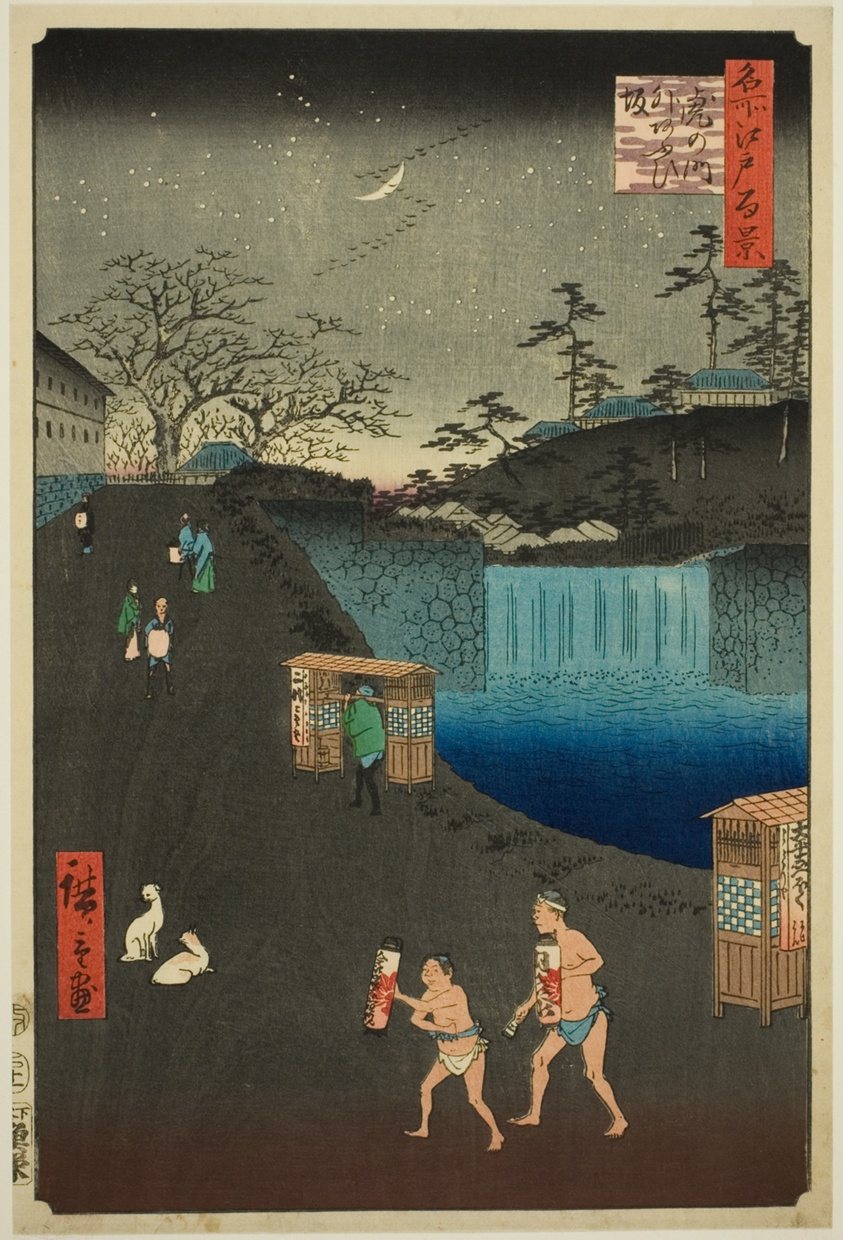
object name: Print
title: Aoi Slope, Outside Tora Gate (Toranomon-soto Aoizaka), from the series "One Hundred Famous Views of Edo (Meisho Edo hyakkei)"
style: Japanese (culture or style)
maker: Utagawa Hiroshige 歌川 広重; Japanese, 1797-1858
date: 1857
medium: Color woodblock print; oban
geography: Japan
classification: woodblock print; print; asian art